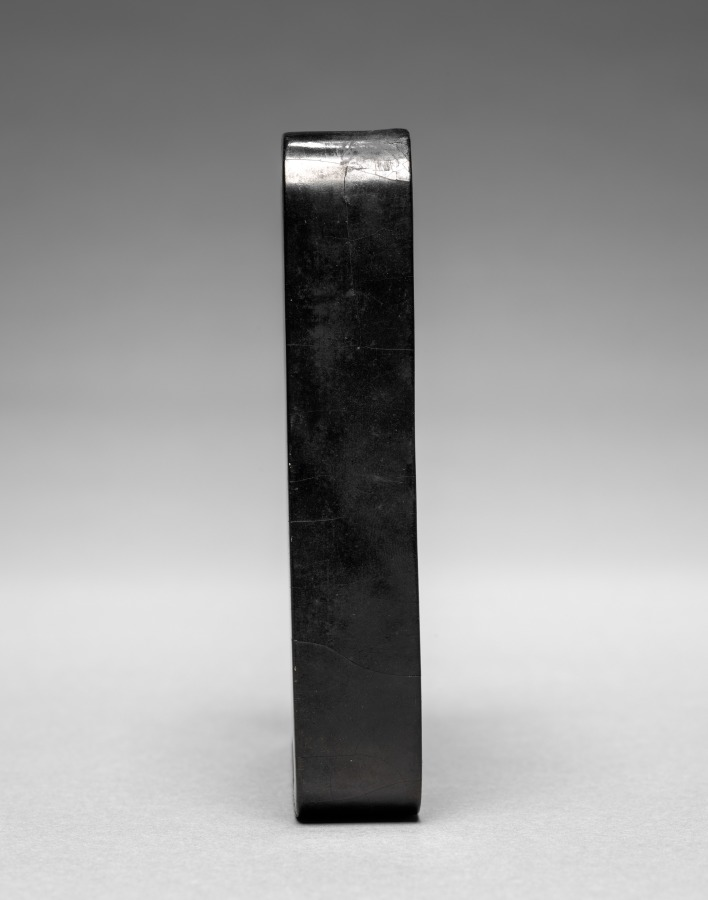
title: Ink Cake with Architectural Design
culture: China, Qing dynasty (1644-1911), Qianlong inscription, mark, and reign (1736-95)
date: 1736–95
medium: molded ink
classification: Miscellaneous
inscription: 大清乾隆年制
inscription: 待月樓珍藏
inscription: 御墨. 光分太乙. 吟詠春風里.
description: In China, access to political power was granted to those who passed the civil service examinations, a system that offered official service only at a high level of education. Chinese literati-officials, whose daily routine involved administrative work in an office, enjoyed precious objects on their writing desks that offered distraction and demonstrated good taste. By the Ming (1368–1644) and Qing (1644–1911) dynasties, these utensils of the literati studio also became collectibles and were treasured as artworks.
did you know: To make liquid ink, an ink cake is ground against an inkstone with a small quantity of water.